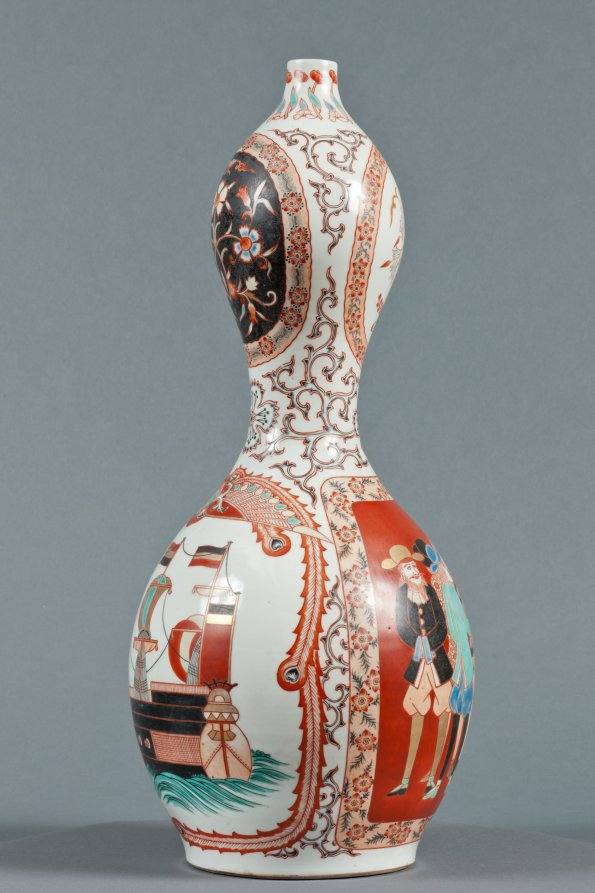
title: Bottle with Western Ships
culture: Japan, Edo period (1615–1868)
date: c. 1800–1868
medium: Porcelain with decoration in colored enamels and underglaze blue, overglaze enamels, and gold (Hizen ware, Arita type)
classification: Ceramic